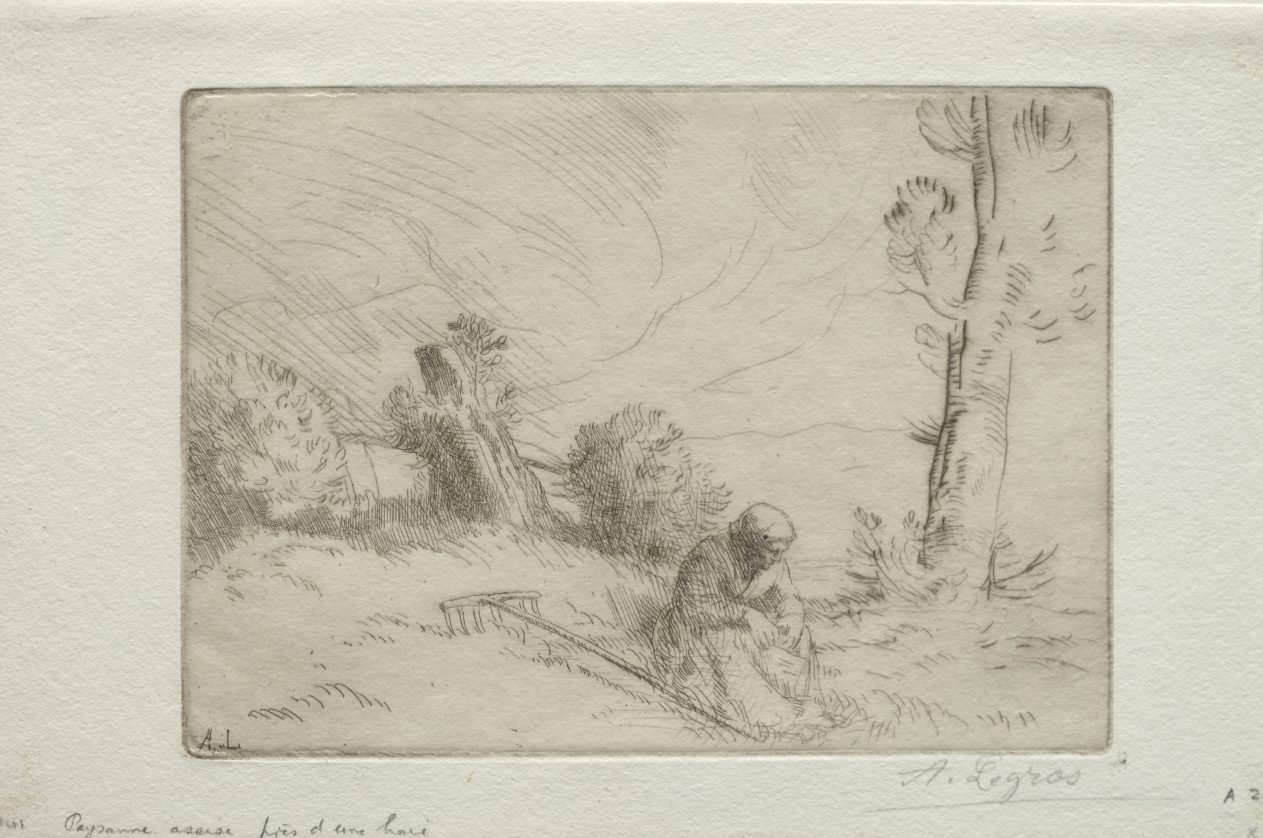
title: Peasant near a Stone Fence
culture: France, 19th-20th century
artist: Alphonse Legros (French, 1837–1911)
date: c. 1857–1911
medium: etching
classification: Print